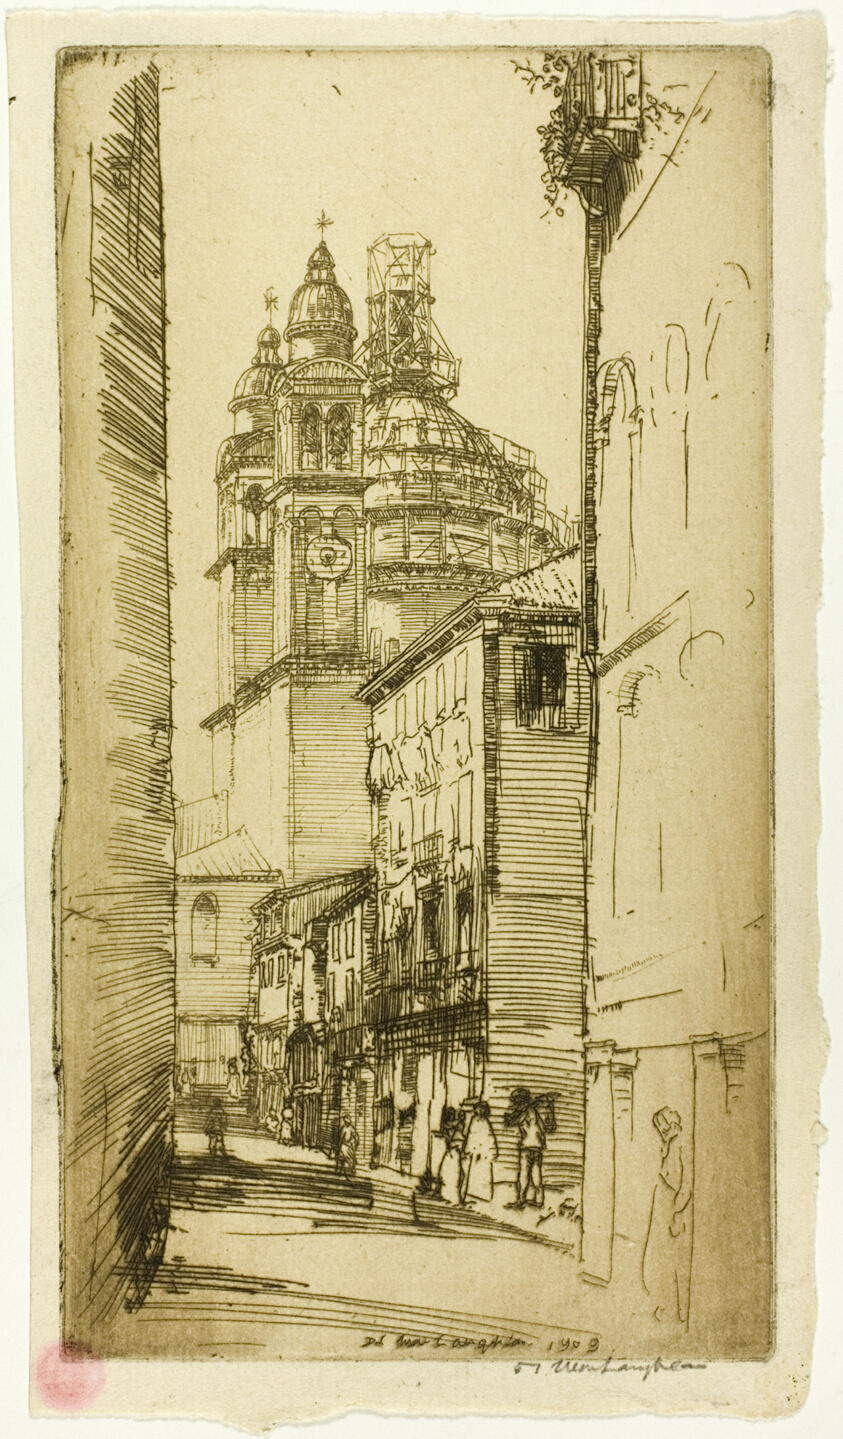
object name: Print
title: The Salute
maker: Donald Shaw MacLaughlan (American, born Canada, 1876-1938)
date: 1909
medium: Etching in siena on cream laid paper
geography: United States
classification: etching; print; prints and drawing